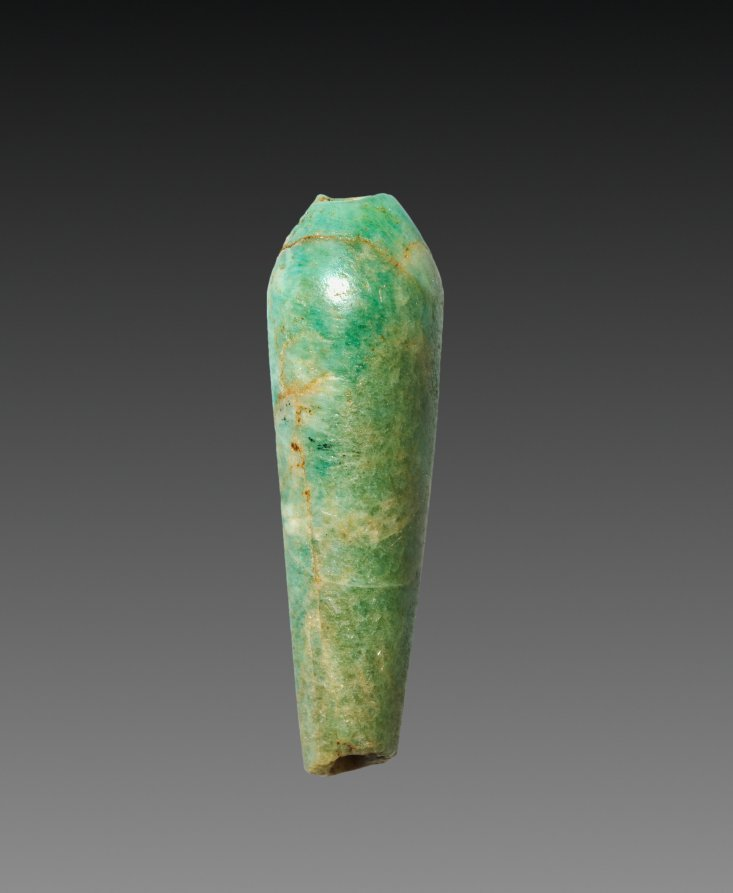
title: Teardrop-Shaped Bead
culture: Egypt, Middle Kingdom (2040–1648 BCE), Dynasty 12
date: 1980–1801 BCE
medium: feldspar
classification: Jewelry